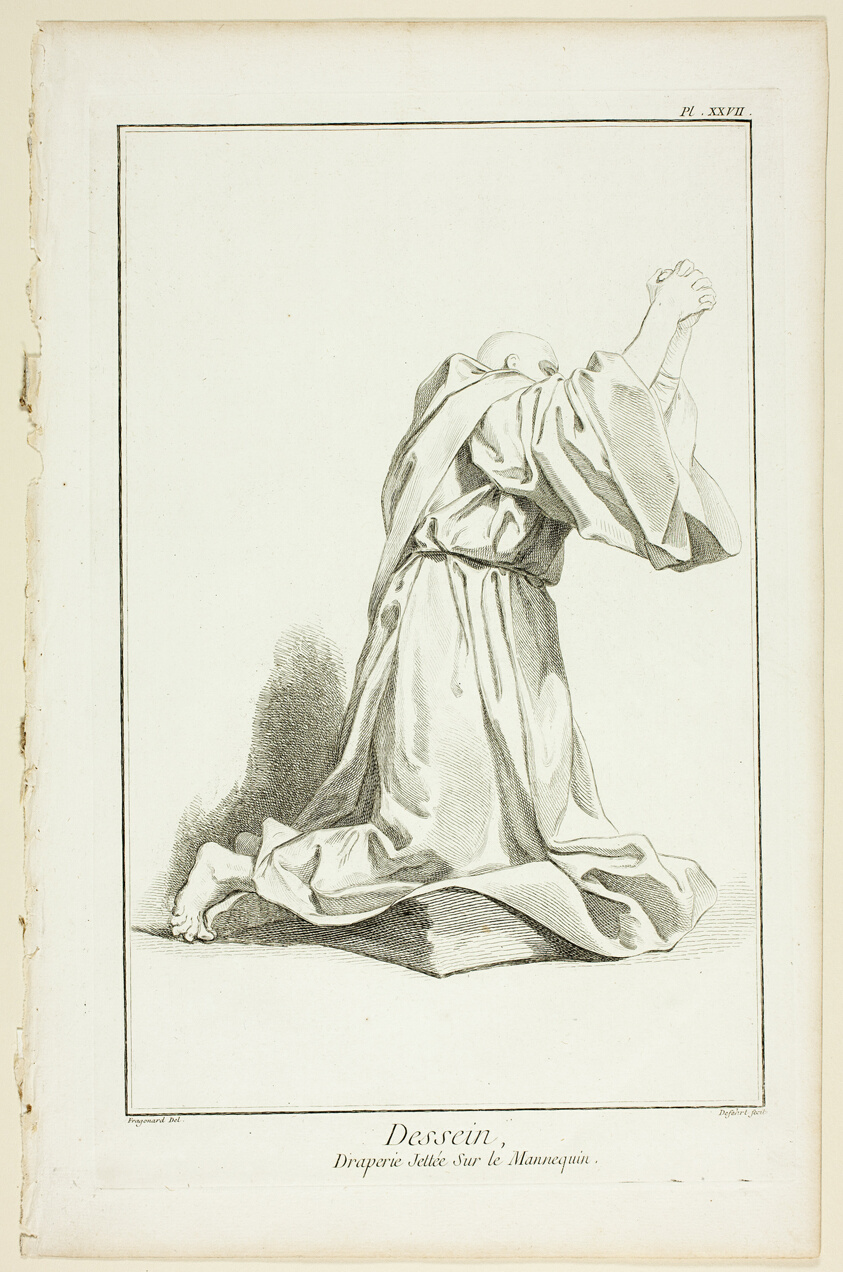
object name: Print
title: Design: Drapery Arranged On a Model, from Encyclopédie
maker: A. J. Defehrt (French, active 18th century); after Jean-Honoré Fragonard (French, 1732-1806); published by André le Breton (French, 1708-1779), Michel-Antoine David (French, c. 1707-1769), Laurent Durand (French, 1712-1763), and Antoine-Claude Briasson (French, 1700-1775)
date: 1762/77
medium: Etching, with engraving, on cream laid paper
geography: France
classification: etching; print; prints and drawing